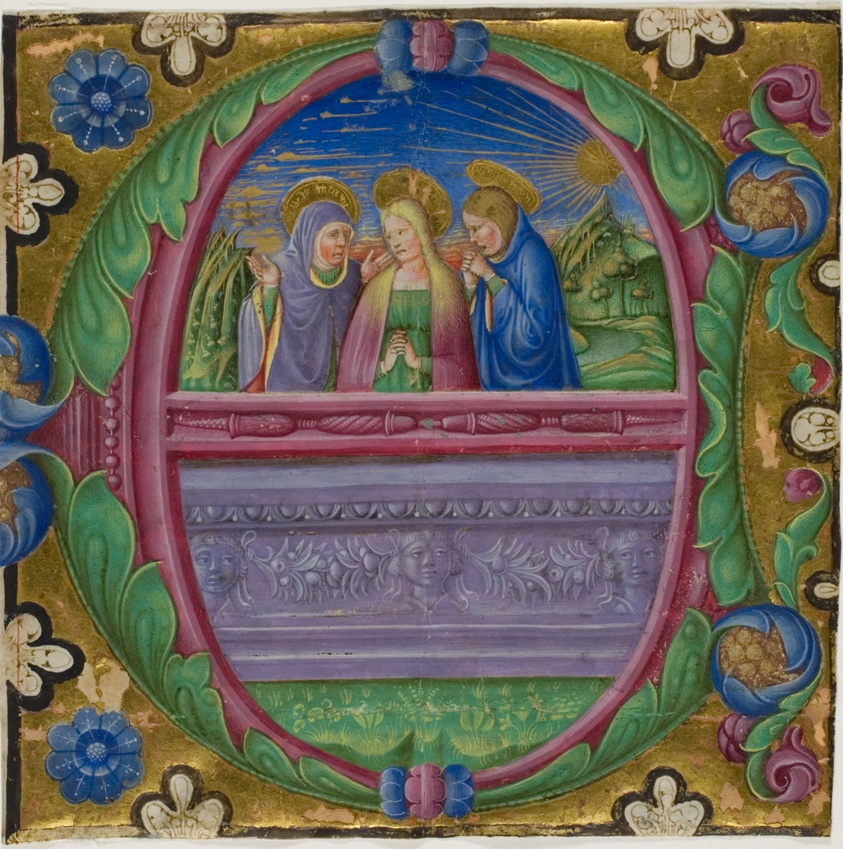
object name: Drawing and Watercolor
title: The Three Marys at the Tomb in a Historiated Initial "E" from a Choirbook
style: medieval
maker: Italian (Ferrara)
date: 1470/80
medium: Manuscript cutting in tempera and gold leaf, with gothica textualis inscriptions in black and ruled in blue, verso, on parchment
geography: Italy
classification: tempera; manuscript; drawings (visual works); prints and drawing